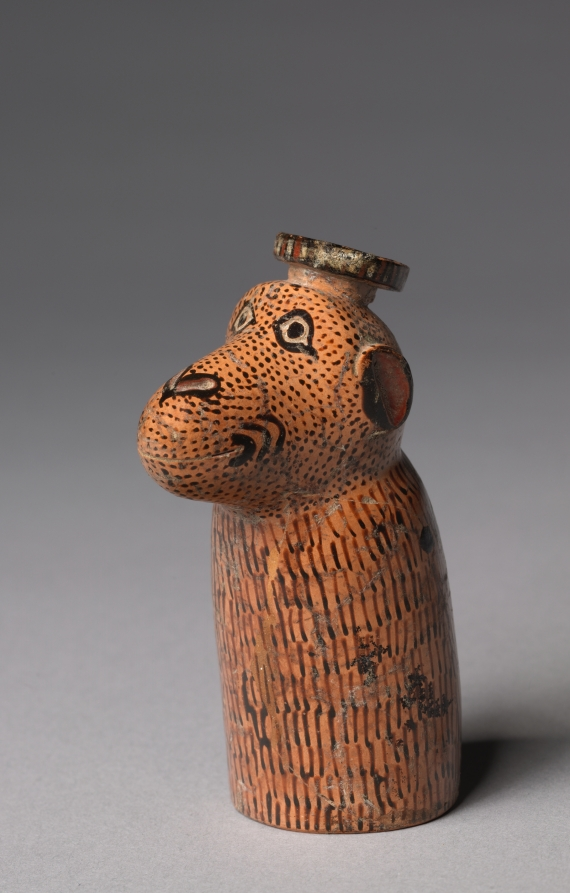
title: Monkey-Shaped Aryballos (Oil Vessel)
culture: East Greek, probably Milesian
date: c. 580 BCE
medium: ceramic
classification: Ceramic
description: Perfume flasks in the form of a monkey are numerous, but few are as well made and preserved as this one. The flask was worn suspended from the wrist by a cord. Its owner would take it to the communal baths and anoint himself with its contents afterward. Such flasks have been found throughout the Mediterranean and Egypt, but this vessel was likely made at a Greek settlement on the west coast of Asia Minor.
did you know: An aryballos is a small jar for scented oils and perfumes.